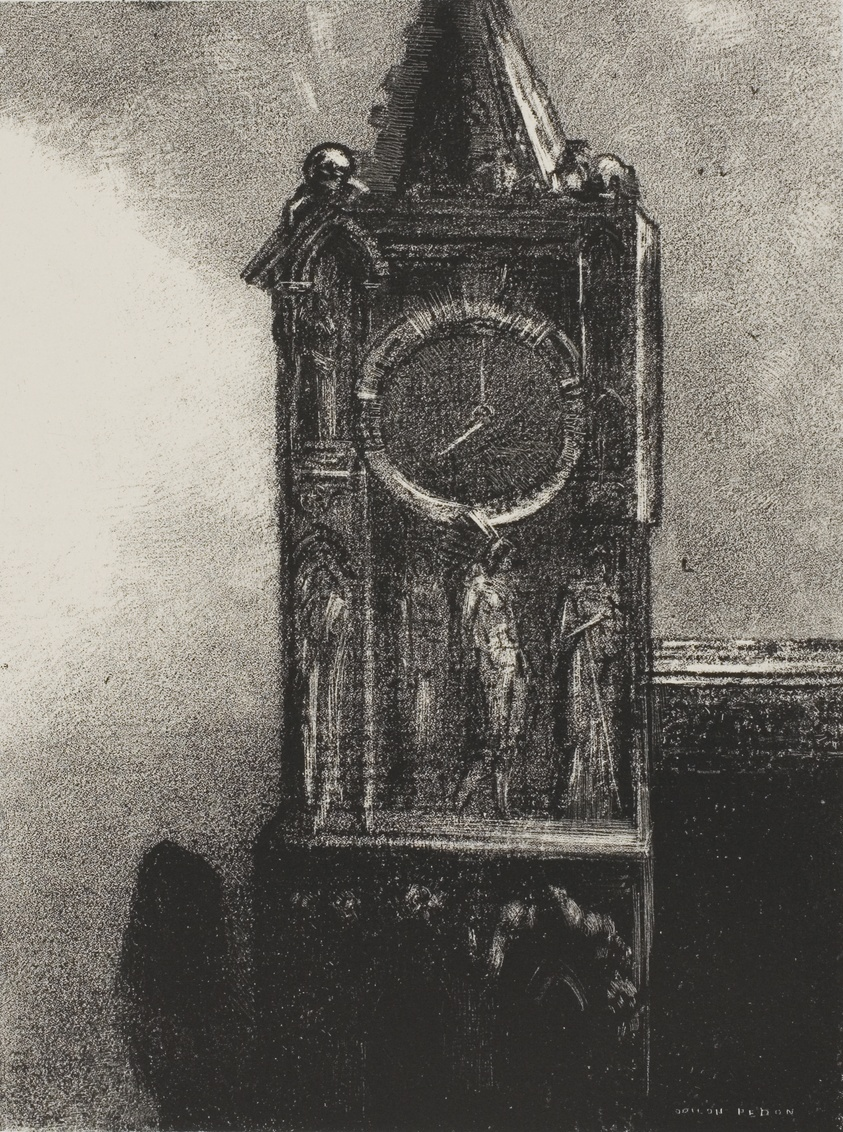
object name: Print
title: A Bell was Sounding in the Tower, from The Juror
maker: Odilon Redon (French, 1840-1916)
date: 1887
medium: Lithograph in black on ivory China paper collé, laid down on white wove paper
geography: France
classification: lithograph; print; prints and drawing; paper